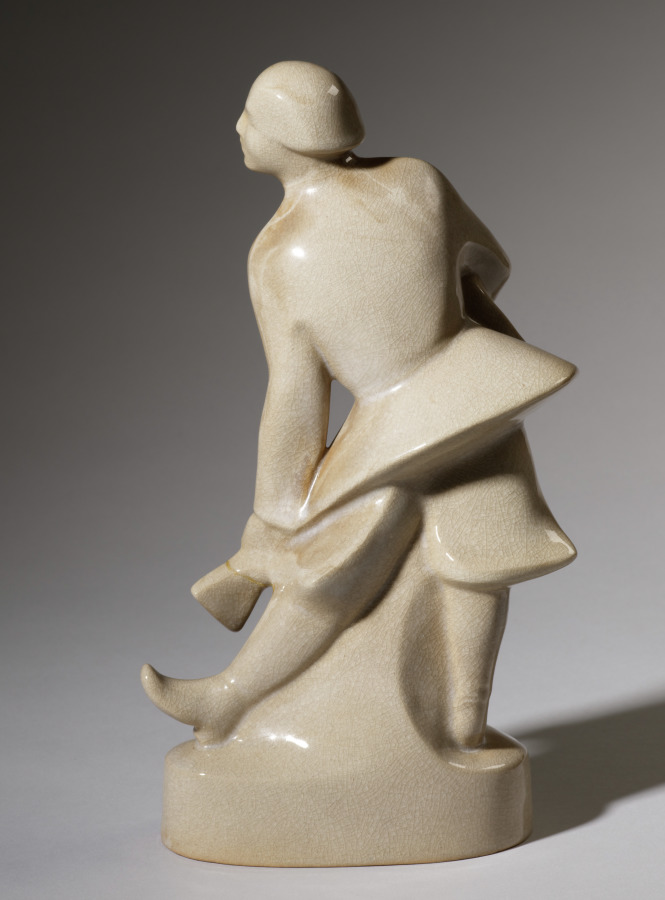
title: Balalaika Player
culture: America, Ohio, Cleveland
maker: Cowan Pottery Studio (America, Rocky River, Ohio, 1920–1931)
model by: Alexander Blazys (American, born Russian Empire [now Lithuania], 1894–1963)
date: 1927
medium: mold-made ceramic, glazed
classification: Ceramic